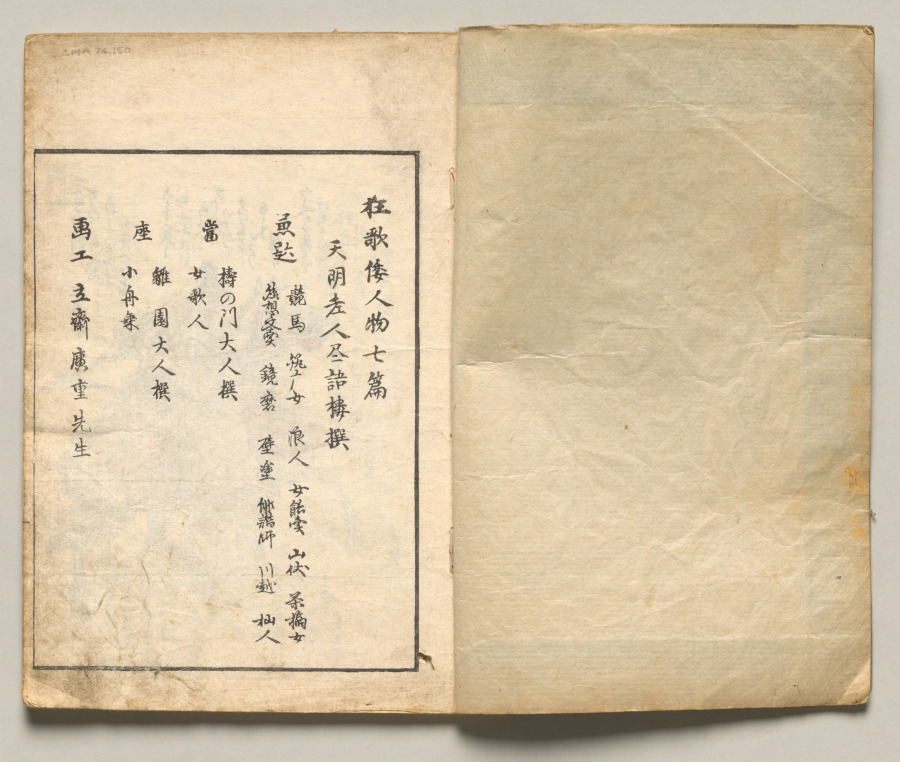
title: Spread One from Volume Seven of People of Japan in Light Verse (Kyōka)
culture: Japan, Edo period (1615–1868)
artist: Utagawa Hiroshige (Japanese, 1797–1858)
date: 1857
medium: Woodblock-printed book; ink and color on paper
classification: Bound Volume